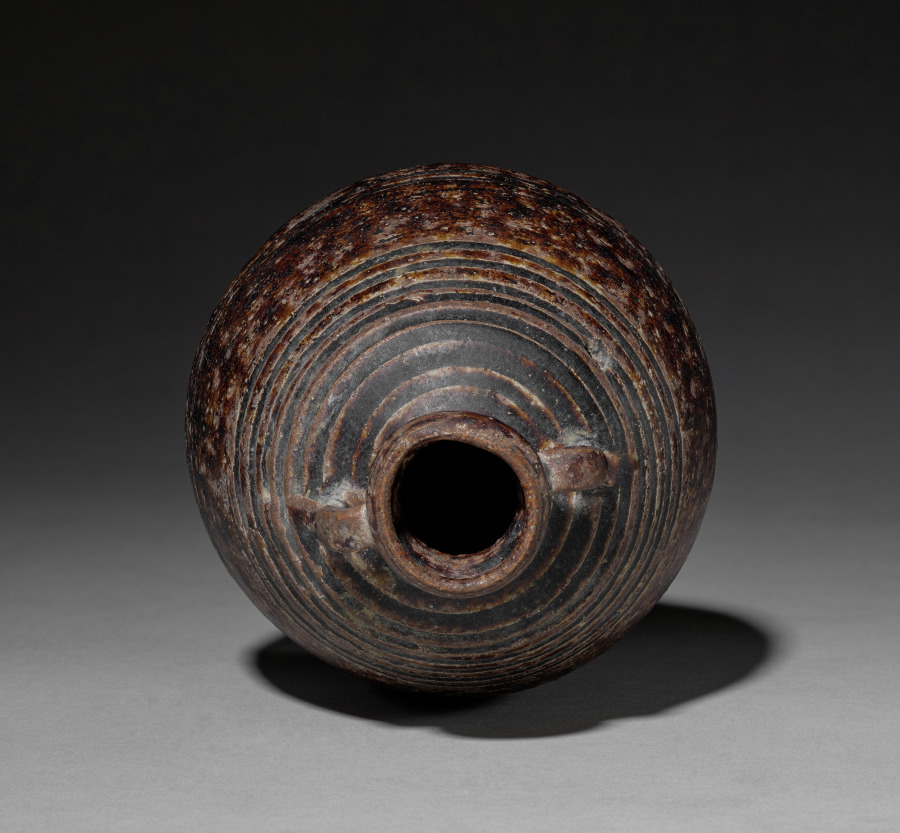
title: Bottle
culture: Siam, Sawankhalok ware, late 13th-14th Century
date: late 1200s-1300s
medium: stoneware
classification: Ceramic